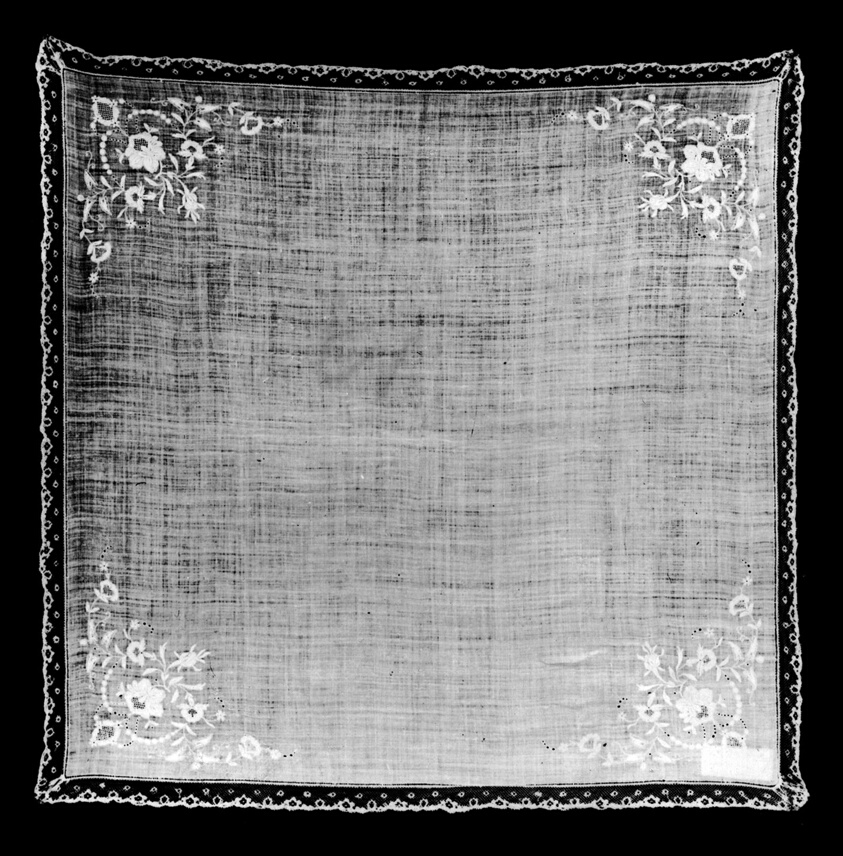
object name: Textile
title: Handkerchief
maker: France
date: 1825/75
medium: Linen, plain weave; pulled thread work in diagonal drawn filling stitches; embroidered with cotton in back, buttonhole, eyelet, hem, padded overcast, and padded satin stitches; French knots; edged in cotton and linen, Levers machine lace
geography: France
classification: textile; needlework - lace; accessories (object genre); weaving